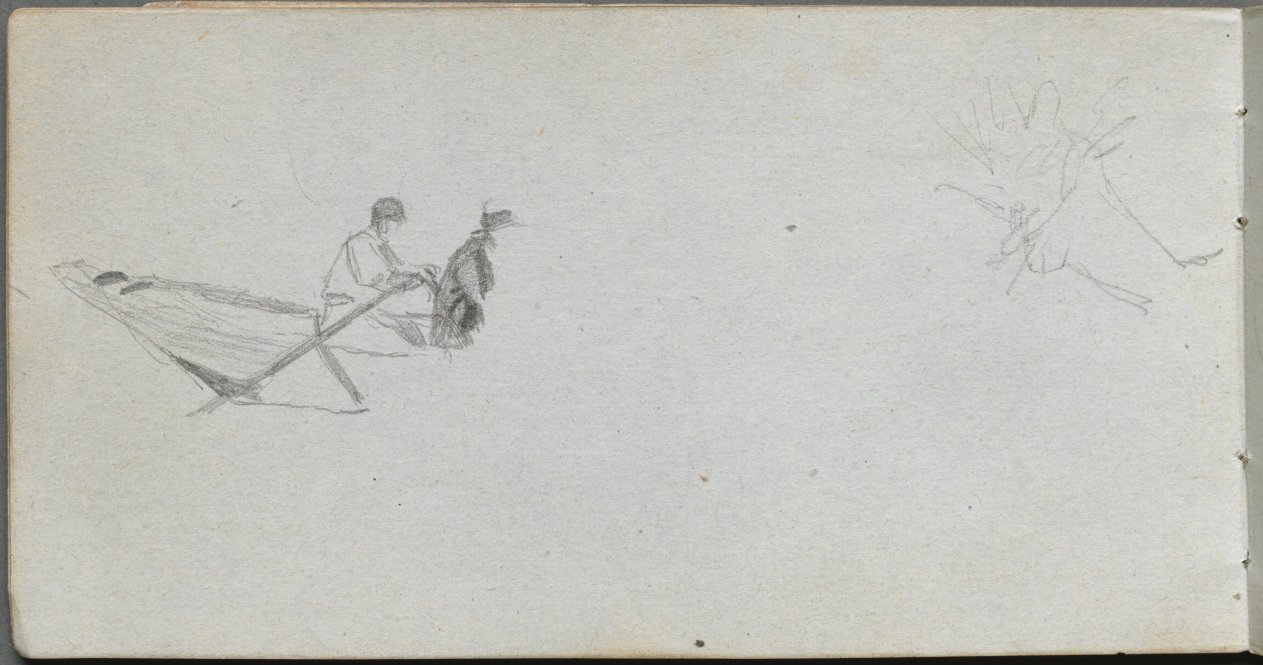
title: Sketchbook, page 4: Figures in a Boat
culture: France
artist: Ernest Meissonier (French, 1815–1891)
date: c. 1860s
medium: graphite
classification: Bound Volume